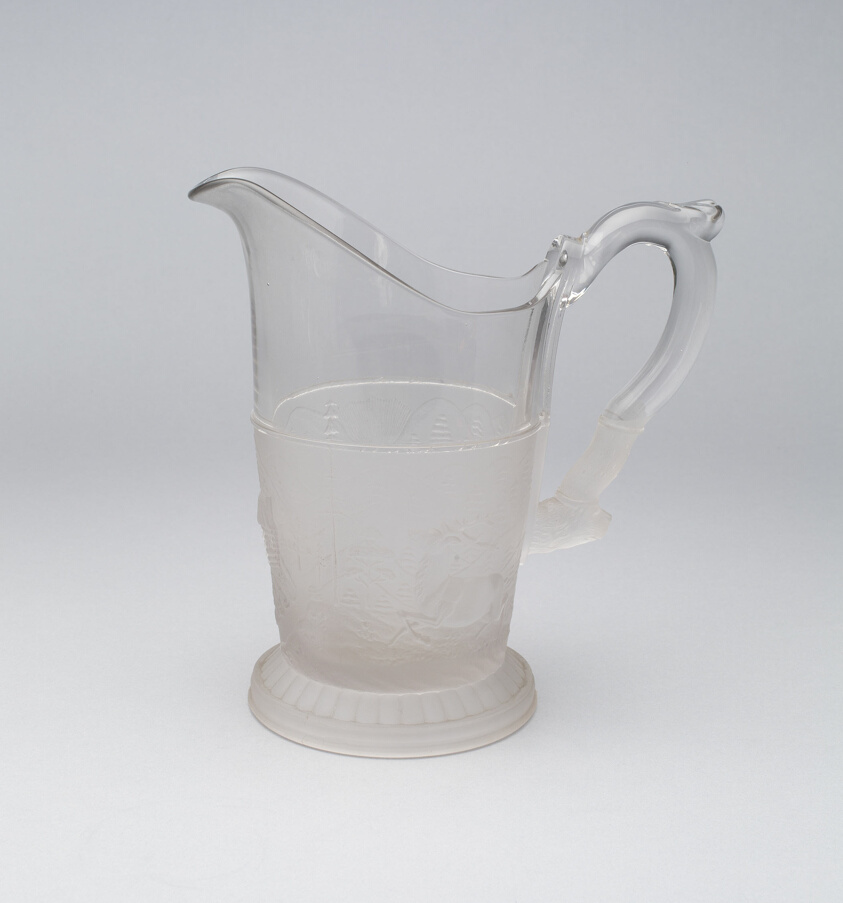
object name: Glass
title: "Westward Ho!/Pioneer" pattern pitcher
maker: Gillinder and Sons, 1861–c. 1930; Philadelphia or Greenbsburg, Pennsylvania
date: c. 1876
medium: Glass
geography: Philadelphia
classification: pitcher (vessel); glass; american decorative arts; american arts; decorative arts